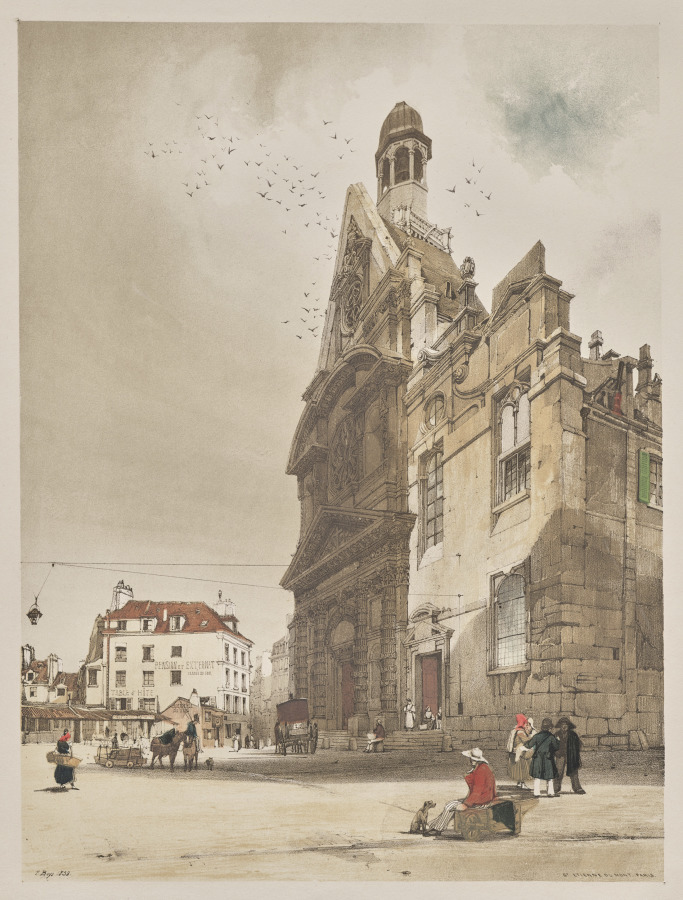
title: Picturesque Architecture in Paris, Ghent, Antwerp, Rouen: St. Etienne du Mont, Paris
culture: England, 19th century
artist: Thomas Shotter Boys (British, 1803–1874)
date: 1839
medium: lithograph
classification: Portfolio